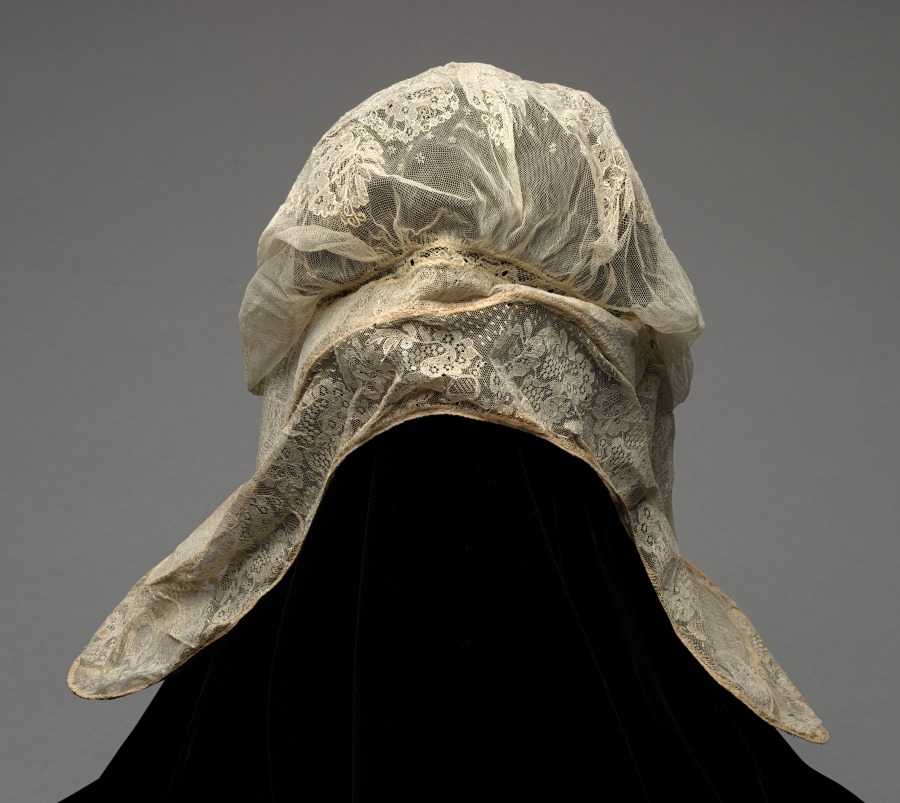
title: Lace Cap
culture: Netherlands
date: 1800s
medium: Net lace, embroidered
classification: Garment